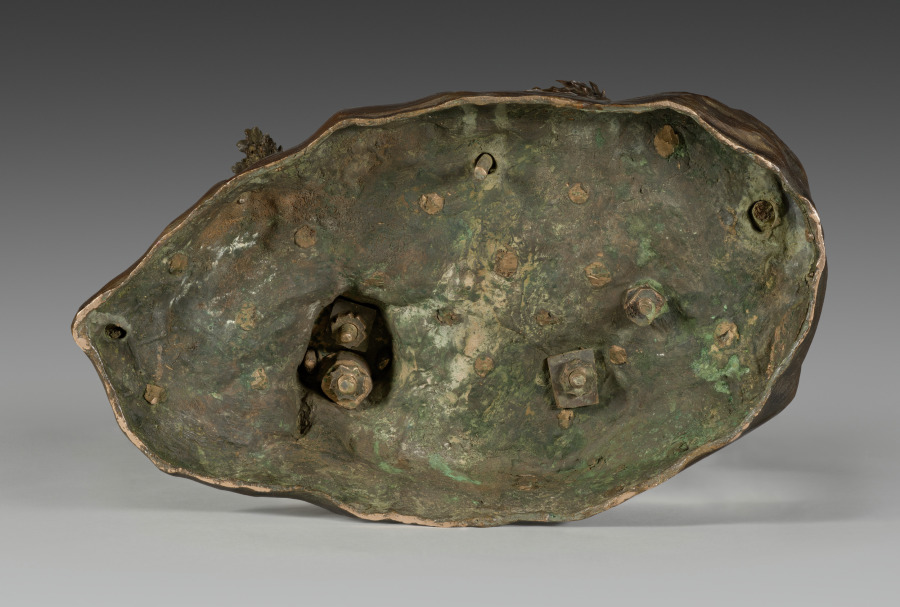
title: Apollo Flaying Marsyas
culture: Italy, Florence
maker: Giovanni Battista Foggini (Italian, 1652–1725)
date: c. 1691–1700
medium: Bronze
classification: Sculpture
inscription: 1136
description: According to myth, the overconfident satyr (half-goat, half-man) Marsyas challenged Apollo, god of the arts, to a musical duel. The defeated Marsyas was tied to a tree and skinned alive in punishment for his pride. Foggini’s bronze captures the moment after Apollo’s victory as the bound Marsyas cries out in agony while the god makes the first incision. The satyr’s anguish is echoed by the gnarled branches; Apollo’s wrath is manifested in his billowing drapery.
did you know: The lyre with which Apollo outperformed Marsyas can be seen between his feet, cast down upon his victory.